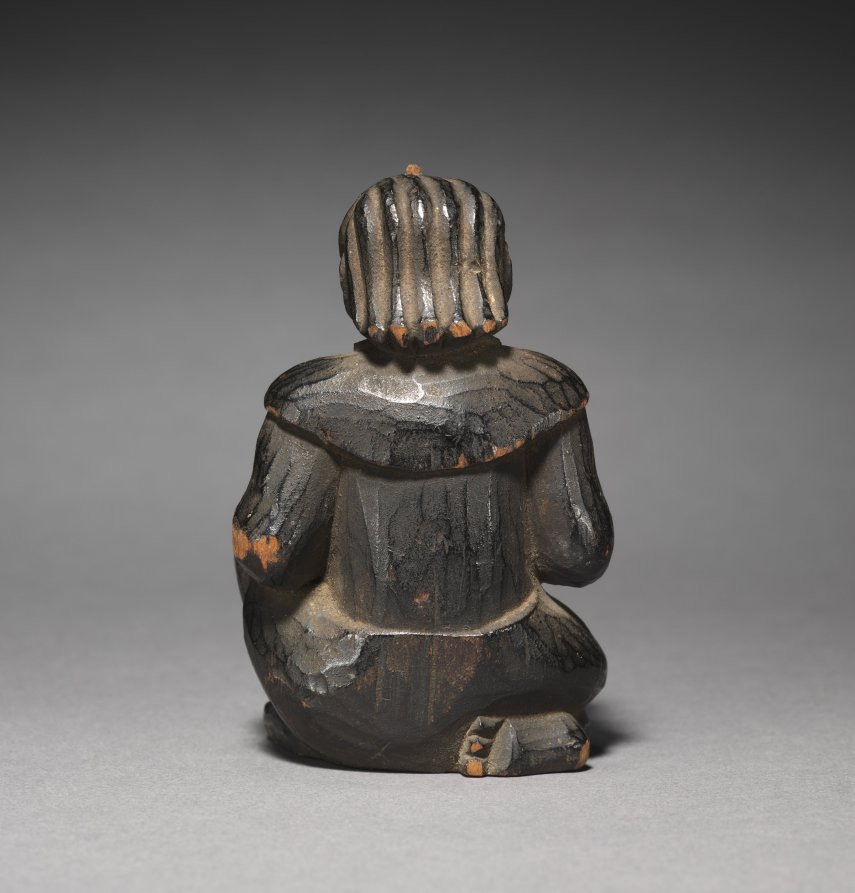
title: En no Gyōja with Zenki and Kōki (Zenki)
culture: Japan, Edo period (1615–1868)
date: 1615–1868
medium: wood and paint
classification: Sculpture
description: This is one of a trio of figures identified as Enno Gyoja and his two attendants, Zenki and Kōki. The set follows the iconography of Shugendo, the traditional mountain ascetic practice in Japan. Enno Gyoja is depicted as a hermit-monk, seated on a rock attached to a modern base. He holds a staff in his right hand and a sutra in the left. The two attendants take the form of half-human, half-demonic figures and are regarded as a married couple.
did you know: This Edo period sculpture shares the iconography and religious function with Seated Zenki and Kōki, CMA 2012.40, from the earlier Muromachi period.